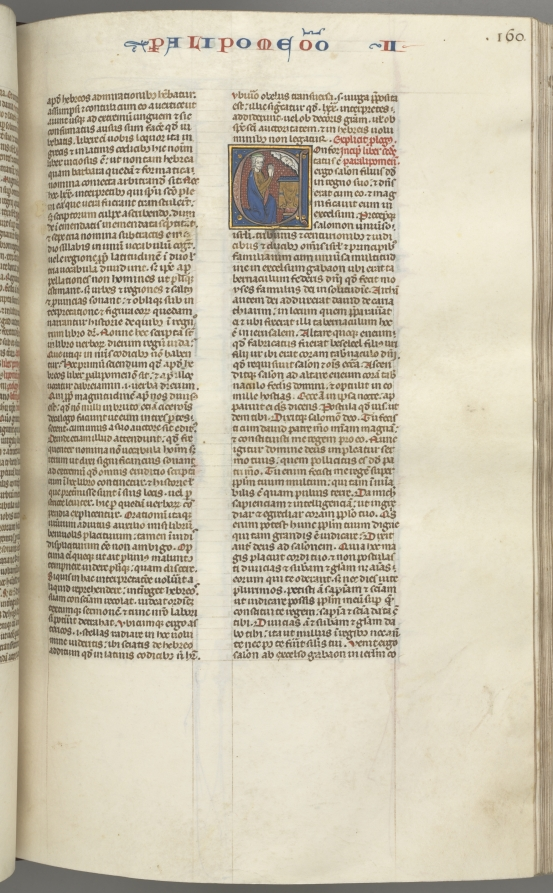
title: Fol. 160r, Chronicles II, historiated initial C, Solomon kneeling before an altar praying, a bust of God above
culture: Southern France, Toulouse(?), 13th century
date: c. 1275–1300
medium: ink, tempera and gold on vellum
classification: Bound Volume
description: Biblical manuscripts were highly prized and important possessions of churches, monasteries, cathedral schools, and universities throughout medieval Europe. The biblical texts were known as the vulgate, the translations made by Saint Jerome in the fourth century from Hebrew and Greek into Latin, which became the definitive and official Latin version of the Roman Church. In the 13th century, the bible was, for the first time, produced as a single volume with an officially sanctioned sequence to its books and chapters as illustrated by this example. The very extensive decoration of this bible is arranged hierarchically to indicate the relative importance of the various texts so that full or almost full-page initials mark the openings of the first prologue, Genesis, and the first Gospel; historiated initials mark the beginning of each book and illuminated initials mark the Prologues.